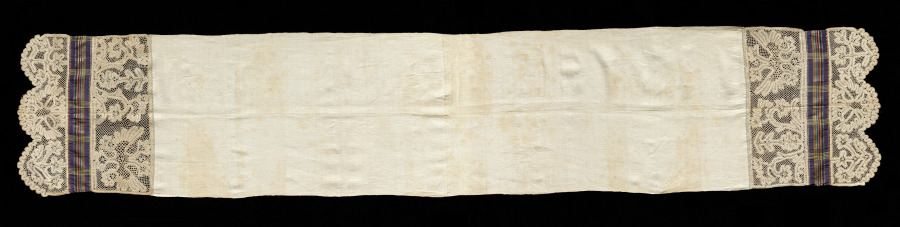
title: Towel with Lace Ends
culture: Russia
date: 1800–1840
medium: cotton or linen (est.); straight (continuous) bobbin lace (Vologda tape lace); the tape forms figural or plant motifs outlined with gimp (heavy cord); plaited ground links the tape; applied silk (est.) ribbon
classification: Lace